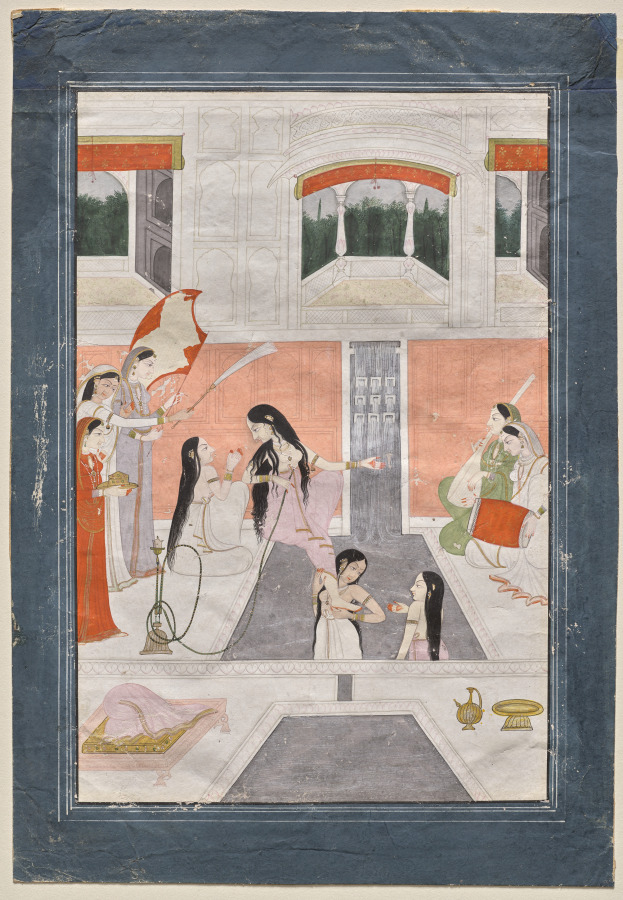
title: Palace women enjoy music by the side of a cascade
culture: Northern India, Pahari kingdoms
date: c. 1780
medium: gum tempera, gold and silver on paper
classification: Painting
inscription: Purple stamp reading "ON BILASPUR DAIS SERVICE". Written in pencil in a European hand: "A.Z" and "silver"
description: Sitting by an artificial cascade in a palace, a woman smokes a hookah and enjoys a music performance with her attendants. She raises her left hand in appreciation of the musicians and turns toward a companion (sakhi) who also shares her enthusiasm. Three attendants stand behind her—one holding a box of betel leaves, while the other two hold a fly whisk and a fan.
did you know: One woman is gently washing the right foot of the lady. This composition is based on a Mughal painting.